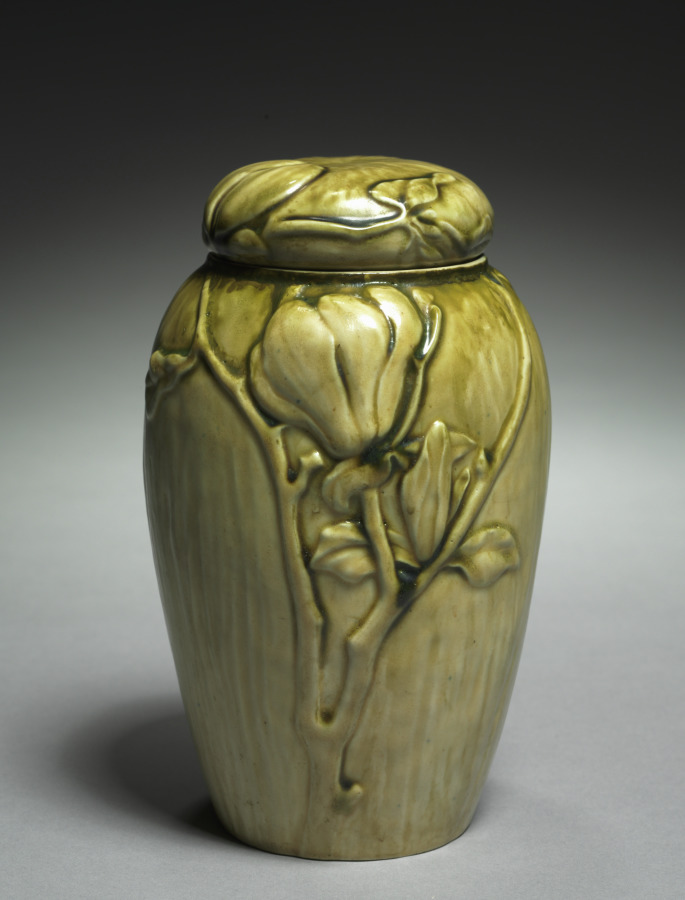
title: Magnolia Ginger Jar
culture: America, New York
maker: Tiffany Studios (United States, New York, 1902–32)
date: c. 1904–14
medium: glazed white clay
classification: Ceramic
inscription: LCT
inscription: Tiffany Favrile Pottery P413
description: By 1900 Louis Comfort Tiffany had expanded his empire by increasing the firm’s production of “fancy goods,” including inkstands, candlesticks, clocks, small boxes, desk sets, tea screens, and other functional objects. Along with the array of artistic glass designs from his factory in Corona, Queens, works in ceramic, bronze, other metals, and even jewelry abounded. These affordable luxury items were designed with as much thought to artistry as the great stained glass windows and lamps through which the firm enjoyed unrivaled success.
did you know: Ceramic works were Louis Comfort Tiffany's contribution to the art pottery movement of the early 1900s.